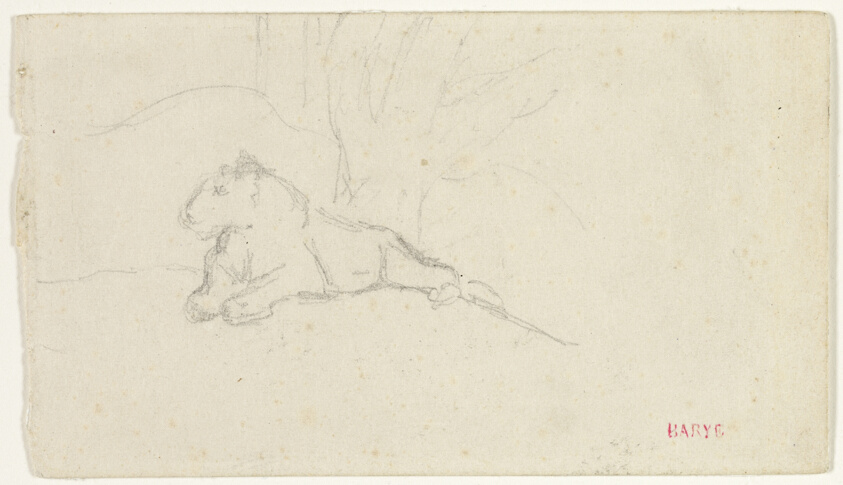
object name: Drawing and Watercolor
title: Lioness Lying near a Tree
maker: Antoine Louis Barye (French, 1795-1875)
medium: Graphite on ivory wove paper, laid down on ivory wove paper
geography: France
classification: graphite; drawings (visual works); prints and drawing